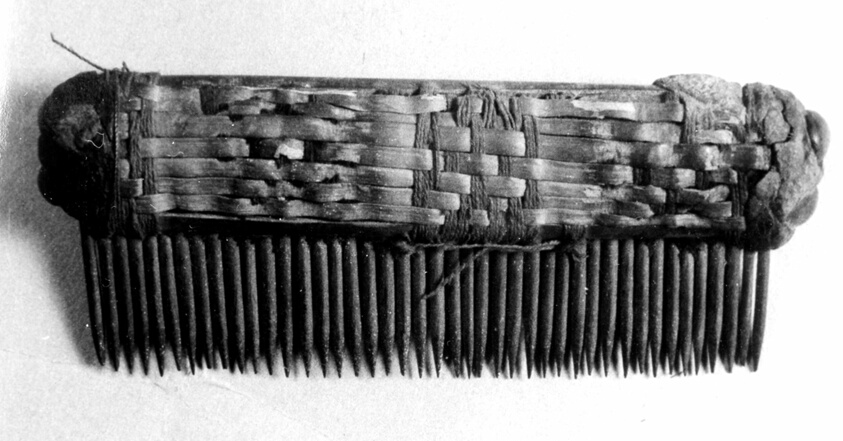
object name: Textile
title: Comb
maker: Peru, Possibly central coast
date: A.D. 1000/1476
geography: Peru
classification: textile; weaving; textile working equipment; accessories (object genre)